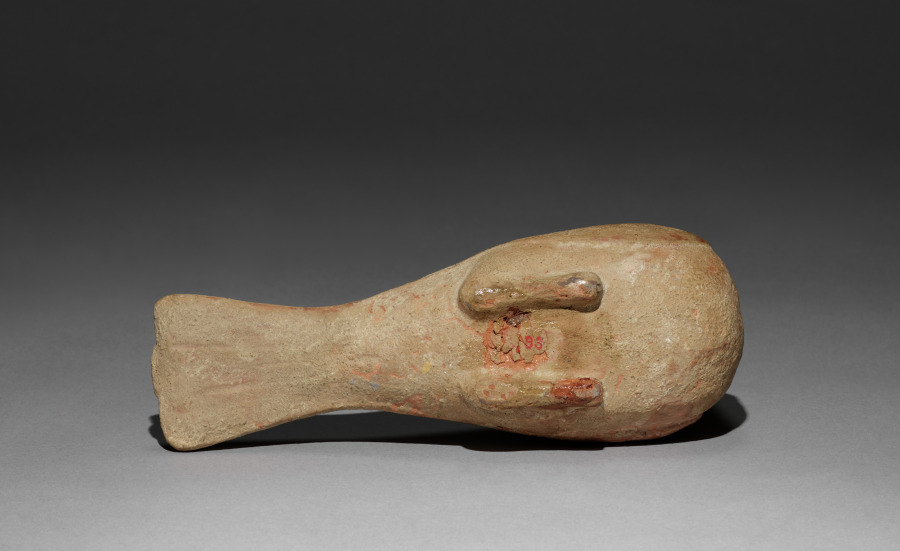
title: Siren-Shaped Perfume Flask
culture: Greece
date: 600–480 BCE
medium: terracotta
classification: Sculpture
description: A half-bird, half-woman creature, a siren lured sailors to death by the sweetness of her song. The most famous sirens appear in the ancient epic the Odyssey. Shaped like a siren, this vessel likely held valuable perfumed oil. Its small mouth limited spillage, and a string attached to the loops on its back allowed it to hand or hold a stopper.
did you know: In the Odyssey, Odysseus’s crew escapes the sirens by plugging their ears with wax.